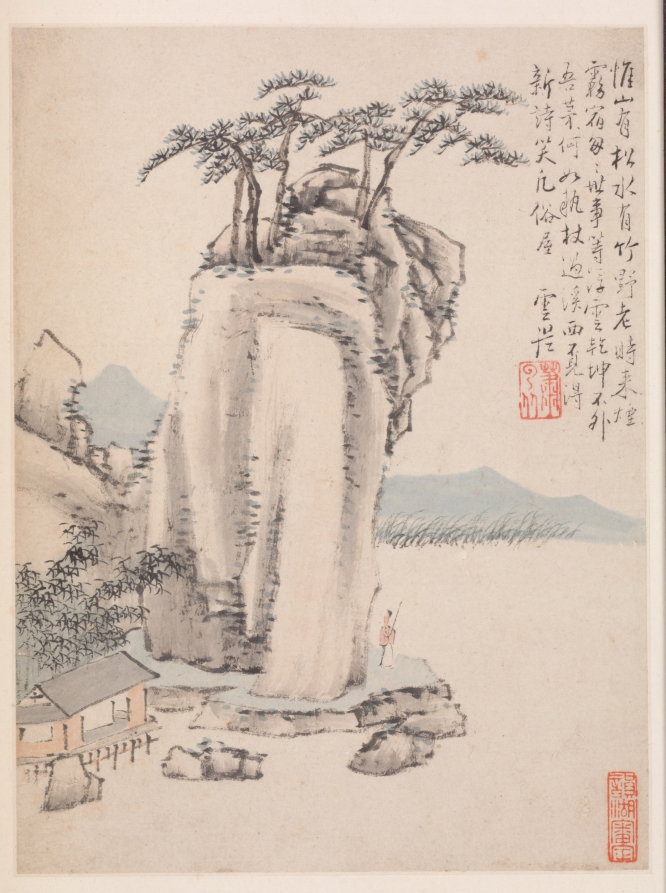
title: Album of Seasonal Landscapes, Leaf G (previous leaf 7)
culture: China, Qing dynasty (1644-1911)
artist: Xiao Yuncong (Chinese, 1596–1673)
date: 1668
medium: album leaf; ink and light color on paper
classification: Painting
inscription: Artist's inscription, signature, and 8 seals: Leaf G. Only at the mountain top are there pines, at the water's edge, bamboo./ Old men from the country often come here to spend the night in the fog./ The hectic pace of worldly affairs is no more to me than drifting clouds;/ My universe does not extend beyond my thatched hut./ What could be better than to grab a walking stick and head to the west of the river,/ Striving to write a new poem that will tease the common crowd. Yuncong [seal] Xiao Yuncong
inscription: 9 additional seals: 2 of Chen Yixi 陳奕禧 (1646-1709); 4 of Li Yufen 李玉棻 [Li Yunhu 李韵湖] (active mid-1800s); 3 unidentified.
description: Throughout his lifetime, Xiao Yuncong visited Nanjing and Yangzhou, cities embedded in the fertile and water-rich Jiangnan region, as reflected in his paintings. Xiao painted from nature, and his landscapes are informed by the seasons and his travels, as well as by his experience as a print designer. Xiao’s fresh, light colors continue to appear in later Shanghai school paintings. This album was formerly in the collection of Li Yufen in Yangzhou and then owned by Wu Hufan in Shanghai. While the artist impressed his seal consistently below his poetic inscriptions in the upper parts of the composition, the red seals on the margins and in the lower corners of the paintings are impressions by the album’s previous owners.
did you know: The season depicted in this leaf is ambiguous, but the presence of bamboo and pine (two of the "three friends" 歲寒三友) points to winter.